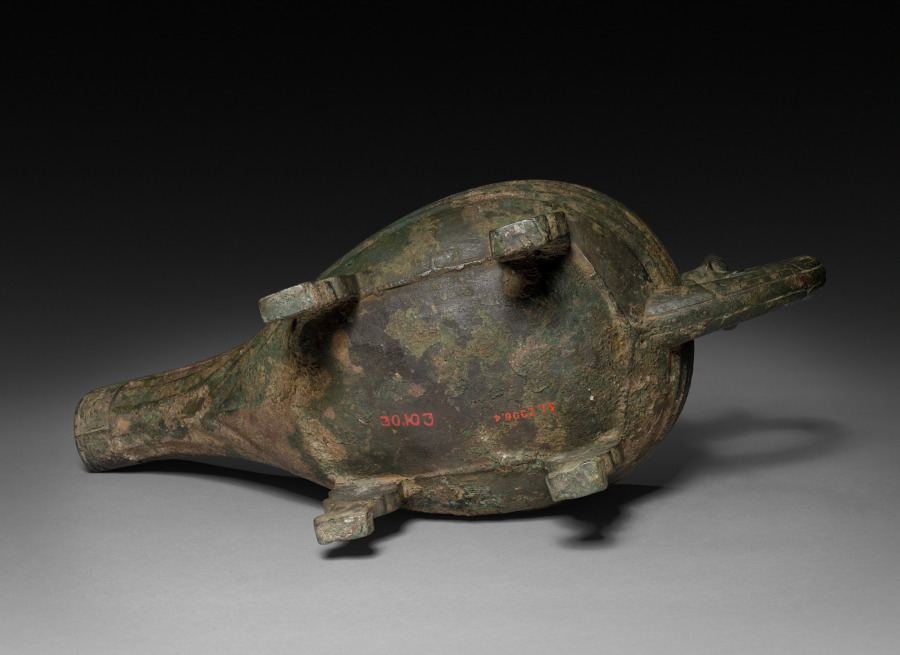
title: Yi: Libation Vessel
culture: China, Zhou dynasty (c. 1046–256 BCE)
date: c. 900–600 BCE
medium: bronze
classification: Metalwork